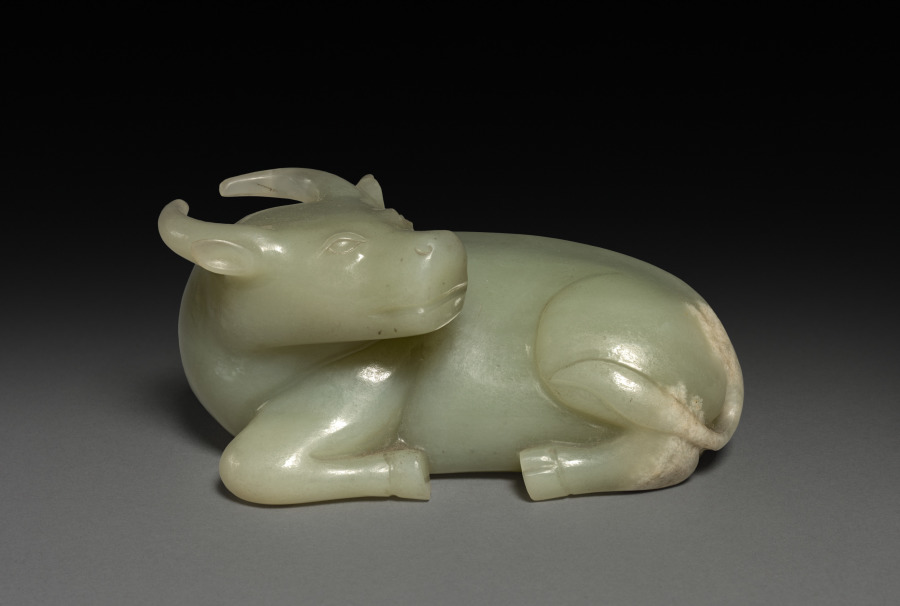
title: Reclining Water Buffalo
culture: China, Qing Dynasty (1644-1911), Kangxi reign (1642-1722)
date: 1642–1722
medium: Jade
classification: Jade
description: In the Ming (1368–1644) and Qing (1644–1911) dynasties, luxury items became more affordable to larger parts of the society, including women, merchants, and literati in non-official positions. Imperial patronage and a growing urban population encouraged consumption of luxury goods and local craftmanship. This jade buffalo illustrates the superb carving skills and the creative mind of its accomplished creator, who sought clients on a competitive market.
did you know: This jade buffalo may have been used as a paperweight on a scholar's desk.